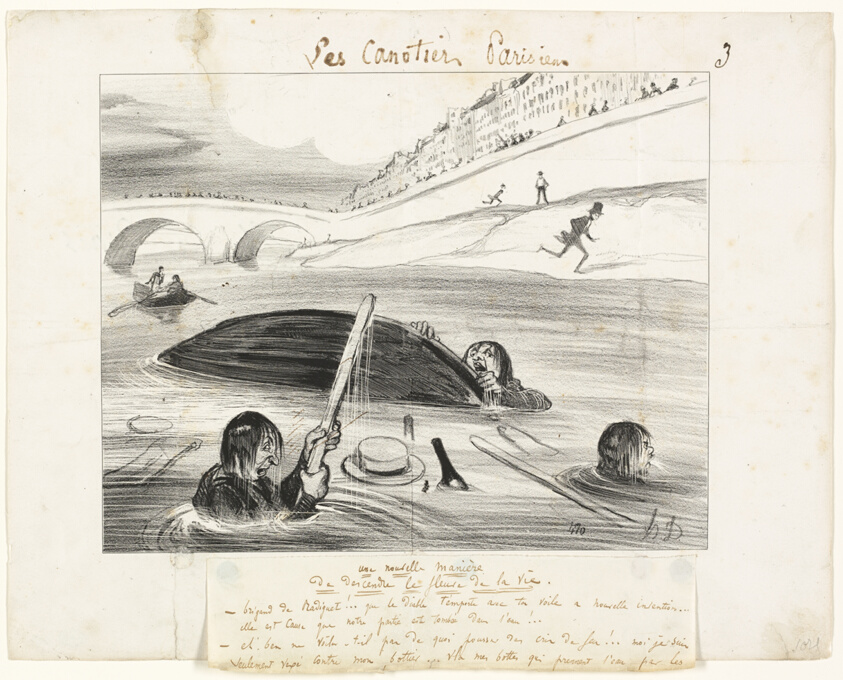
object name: Print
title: A New Way to Float Down the River of Life, plate three from Les Canotiers Parisiens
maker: Honoré-Victorin Daumier (French, 1808-1879)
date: 1843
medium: Lithograph in black, with additions in pen and brown ink and caption in pen and brown ink, on ivory wove paper, tipped onto ivory wove paper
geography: France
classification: lithograph; print; prints and drawing